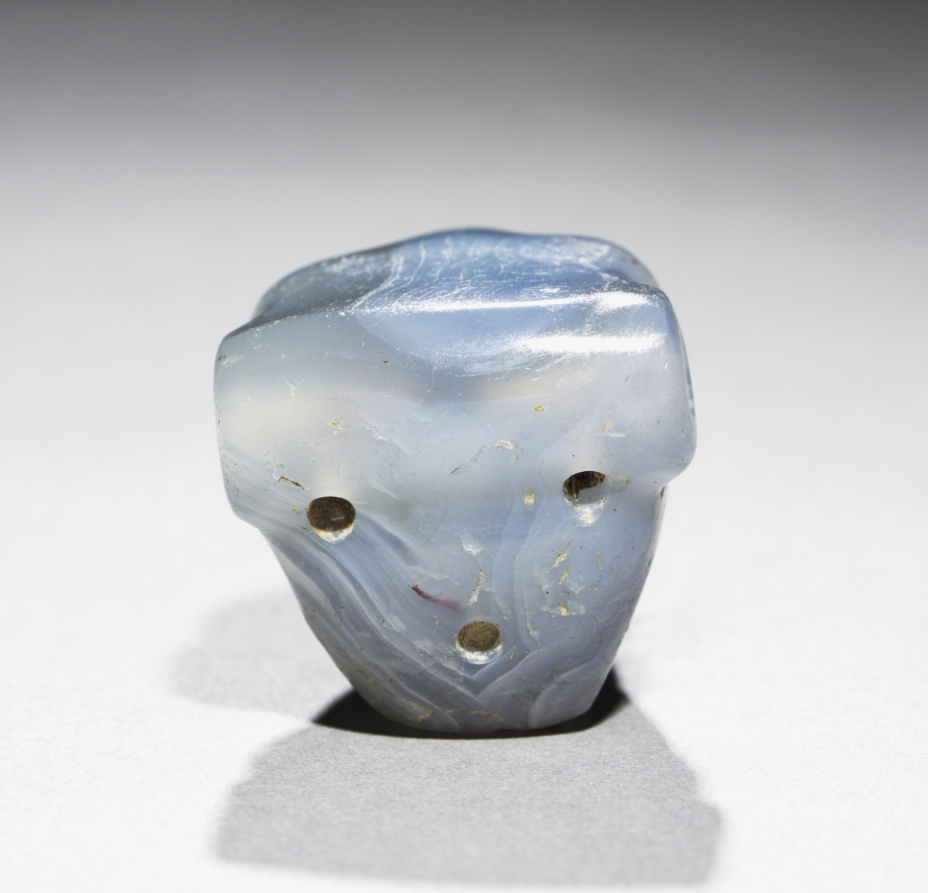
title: Head of a Bull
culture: Mesopotamia, Sumerian, Iraq, Tigris-Euphrates valley, Early Bronze Age I (c. 3300–c. 3000 BCE)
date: 3000–2000 BCE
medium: chalcedony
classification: Sculpture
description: This bull head is carved in a banded stone. The sculptor has ingeniously planned the work so that the veins of the stone enhance the anatomy of the head. Inlays of stone, ivory, or gold (now missing) were set into the eyes and horn sockets. The other holes were used to attach the head to a body of a different material.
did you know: This object is made of quartz, which is used to make electronics today.